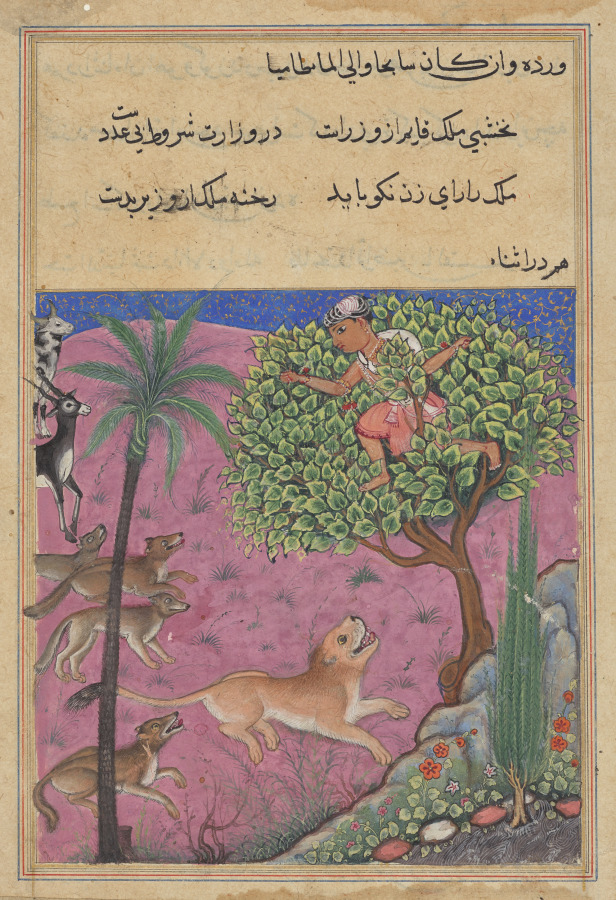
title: The wolf and the jackal, serving as viziers, instigate the lion who pursues the Brahman up a tree, from a Tuti-nama (Tales of a Parrot): Twenty-first Night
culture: Mughal India, court of Akbar (reigned 1556–1605)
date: c. 1560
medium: gum tempera, ink, and gold on paper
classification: Painting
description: The Brahman perches precariously at the top of a tree as the hungry lion waits below surrounded by wolves and jackals. Previously, the lion’s other viziers, the deer and the gazelle, had counseled the lion to treat the Brahman with kindness. They appear again to save the Brahman life.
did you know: The artist has depicted the gazelle and deer as a blackbuck and cow.